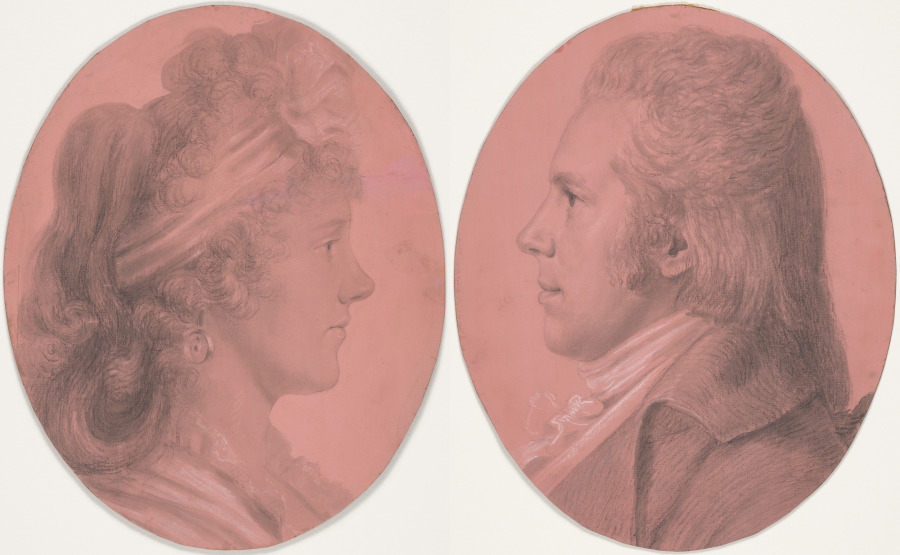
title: Portraits of Georges Arnold Fitzwilliam and Portrait of Eleanor Ramsay Fitzwilliam; a pair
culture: France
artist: Charles Balthazar Julien Fevret de Saint-Mémin (French, 1770–1852)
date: c. 1790–1852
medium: Black and white chalk on buff paper with pink wash in original frames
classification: Drawing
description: This pair of portraits depict George Fitzwilliam, an English merchant, and his American wife Eleanor Ramsay Fitzwilliam, who sat in New York for the French émigré artist Charles Balthazar Julien Févret de Saint-Mémin. Saint-Mémin used a recently invented mechanical device called a physiognotrace to trace accurate profiles of his sitters, which he then completed in black and white chalks. The technology enabled Saint-Mémin to establish a thriving business catering to prominent Americans—including Presidents Washington, Adams, Jefferson, and Madison, Benjamin Franklin, and several Native American chiefs—at a time when he was in exile from the French Revolution. As part of each commission, Saint-Mémin also supplied etchings of the portrait in a reduced size, which could be given as keepsakes to family and friends.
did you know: The physiognotrace device used to create this portrait consisted of a wooden frame within which a sitter posed in profile; the artist then peered through an eyepiece and followed the contour and features of the sitter’s face by maneuvering a graphite pencil attached to the mechanism.